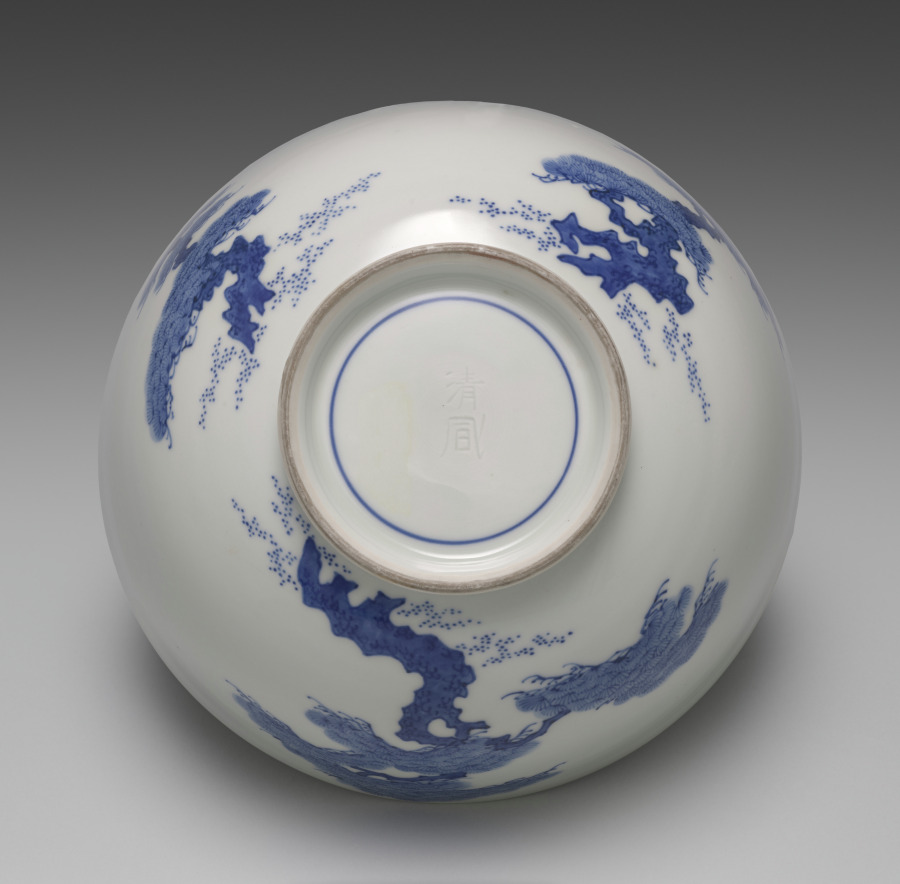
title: Bowl with Pines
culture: Japan, Meiji period (1868–1912)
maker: Seifū Yohei III (Japanese, 1851–1914)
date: 1893–1914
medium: porcelain with underglaze blue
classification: Ceramic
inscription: Inscription by Seifū Yohei IV on the box states that the bowl is the work of Yohei III.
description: The bowl has slightly more detailed surface designs painted in blue under the glaze than some other Yohei III's other teaware, like the Water Cooler with Pines, CMA 2022.163. The three pines, with two, three, and four racks of boughs respectively, have more angular rather than curved trunks, with clearly articulated bark.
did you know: The box for the bowl carries an attestation by Yohei IV that it is the work of his predecessor.